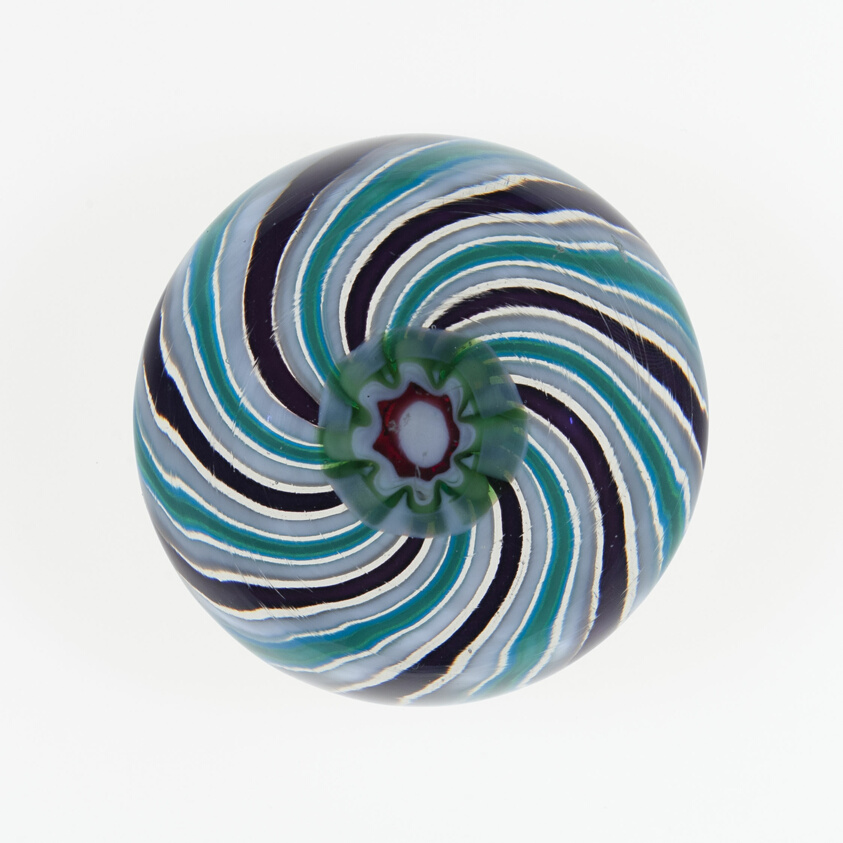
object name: Glass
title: Paperweight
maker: Clichy Glassworks (Cristalleries de Clichy); Clichy, France, 1837-1885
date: c. 1845–60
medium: Glass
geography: Clichy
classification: paperweight; glass